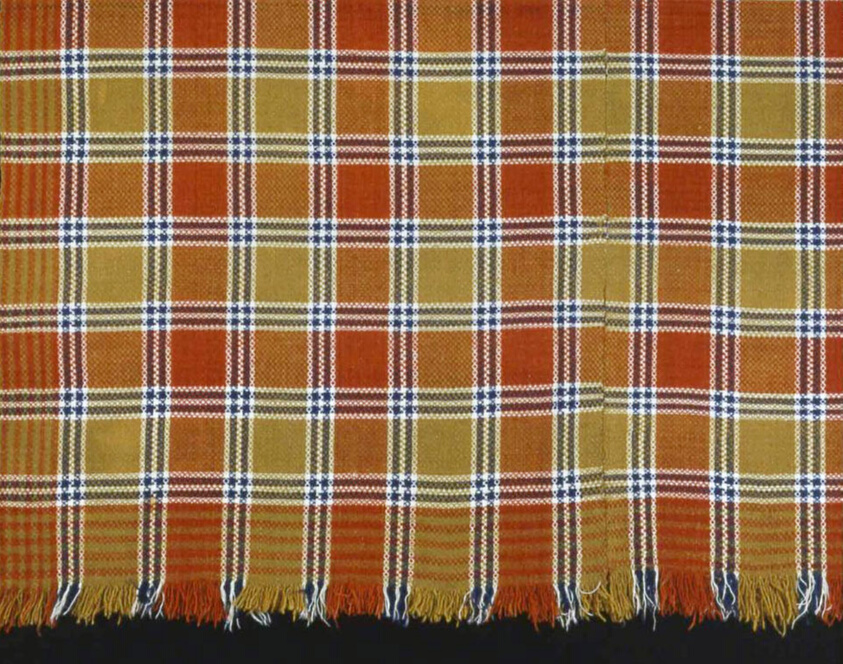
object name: Textile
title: Coverlet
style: 19th century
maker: United States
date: 1820s/30s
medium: Wool and cotton, point twill weave (multiple shaft) with main warp fringe; two loom widths joined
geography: United States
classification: weaving - coverlet; coverlet; textile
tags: plaid, squares, geometric, geometric motif, coverlet